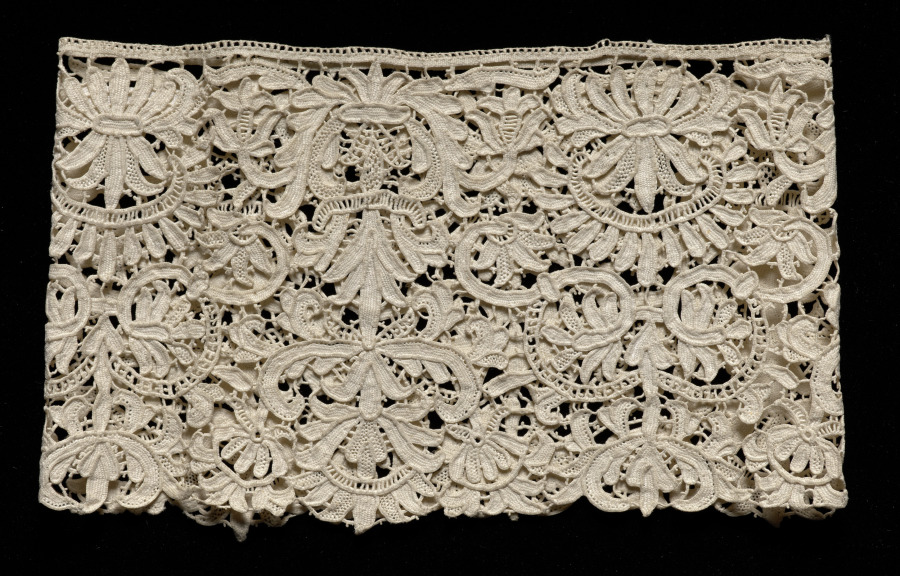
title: Lace Cuff (one of a pair)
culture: Italy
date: 1600–1640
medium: Needle lace (punto in aria)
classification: Lace